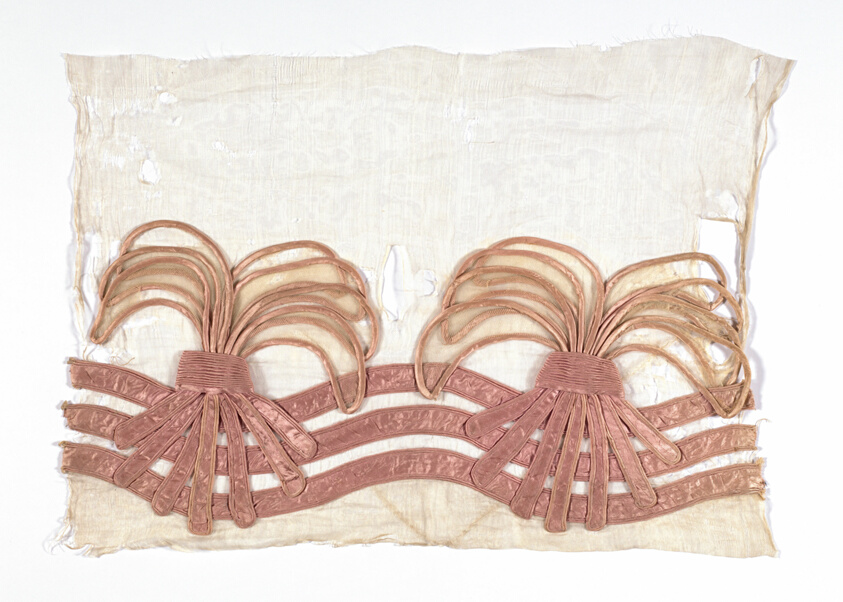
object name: Textile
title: Sample (Dress Trimming)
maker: England or France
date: 1815/35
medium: Cotton, plain weave; appliquéd with silk, satin weave and silk, netting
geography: France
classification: textile; costume; needlework - costume; weaving